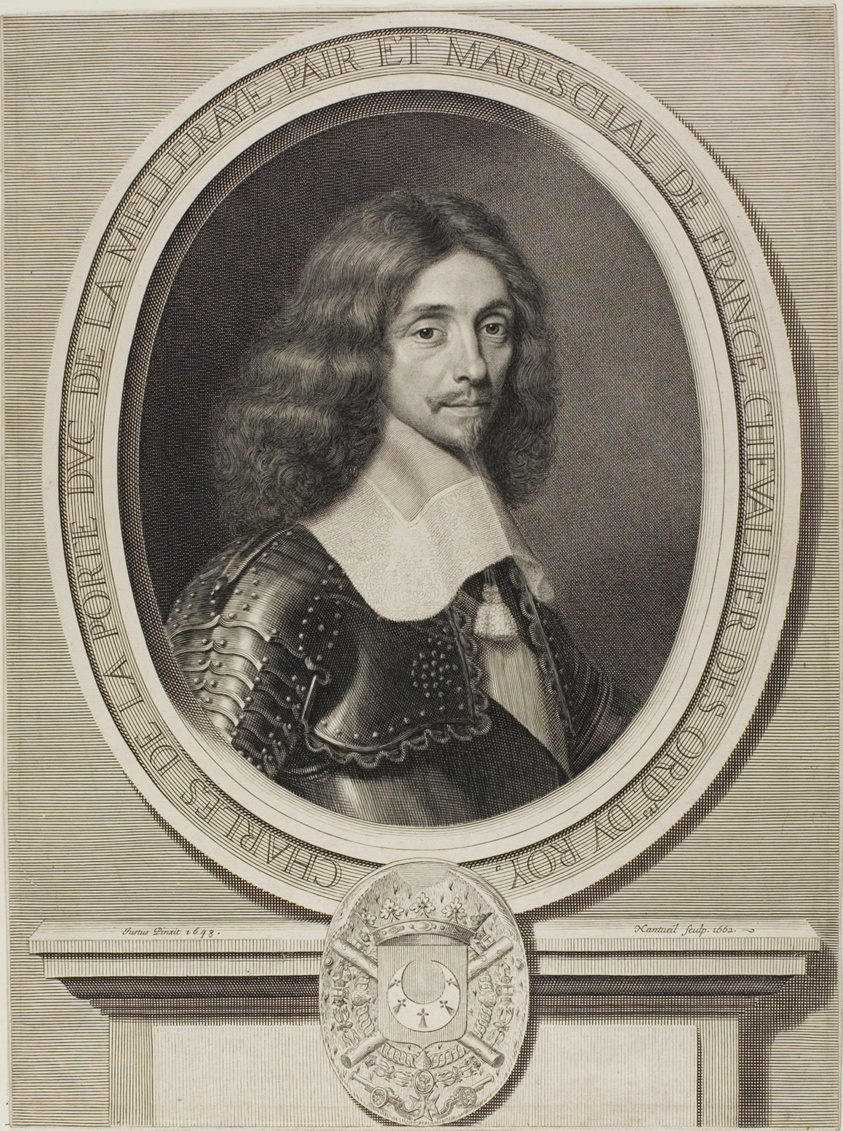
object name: Print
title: Le Maréchal de la Meilleraye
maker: Robert Nanteuil (French, 1623-1678); after Justus van Egmont (Flemish, 1601-1674)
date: 1662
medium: Engraving on paper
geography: France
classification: engraving; print; prints and drawing